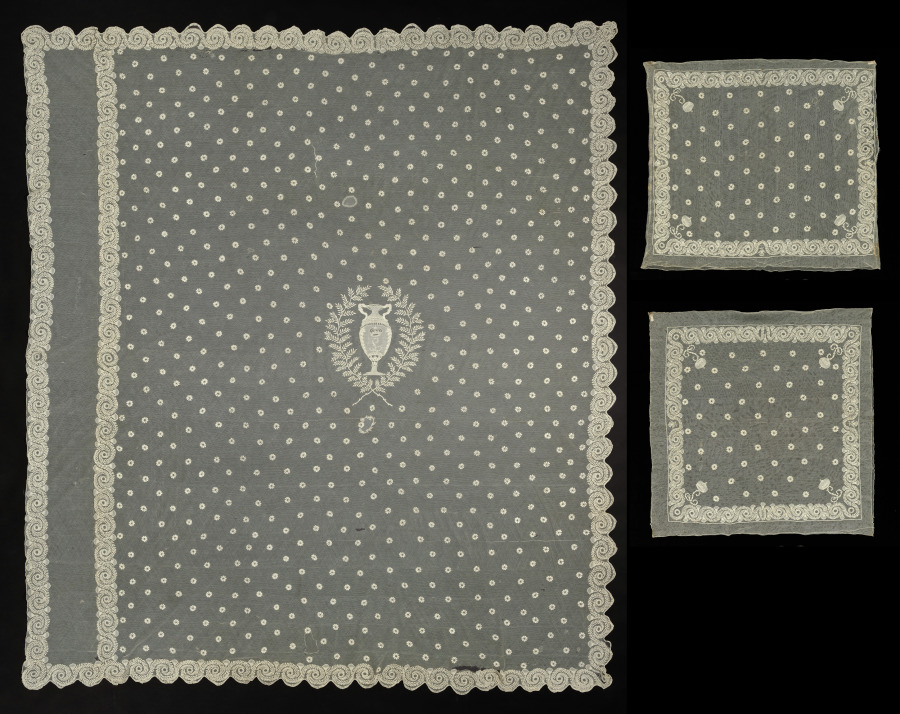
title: Lace Bed Canopy and Pillow Slips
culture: France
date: 1811–15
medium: Cotton: machine made lace net; cotton embroidery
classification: Lace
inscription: "L" embroidered on vase.